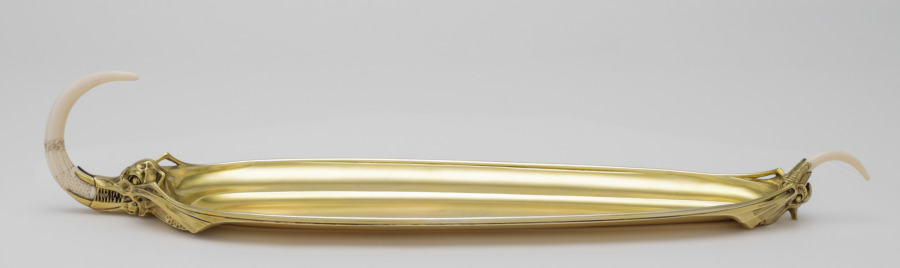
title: Tray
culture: France, Paris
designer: Carlo Bugatti (Italian, 1856–1940)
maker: Adrien-Aurélien Hebrard (French, 1866–1937)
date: c. 1907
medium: Gilt silver and ivory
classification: Silver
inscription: Made by A. A. Hebrard Firm, Paris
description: This tea and coffee service, salver, and table, together with some now missing cups, were all designed by Carlo Bugatti as an ensemble and presented at the 1902 exposition devoted to decorative arts in Turin, Italy. The set was probably acquired from Bugatti's 1907 exhibition at the Galerie Hébrard in Paris by a wealthy South African widow, Anna Blake, who was living there at the time. Some of the animal and insect motifs suggest mythical beasts or the fossils of prehistoric animals. When Mrs. Blake returned to Cape Town, she took these and other pieces designed by Bugatti with her, and they remained in South Africa throughout her lifetime.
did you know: This tray is part of a tea and coffee service designed by Carlo Bugatti.